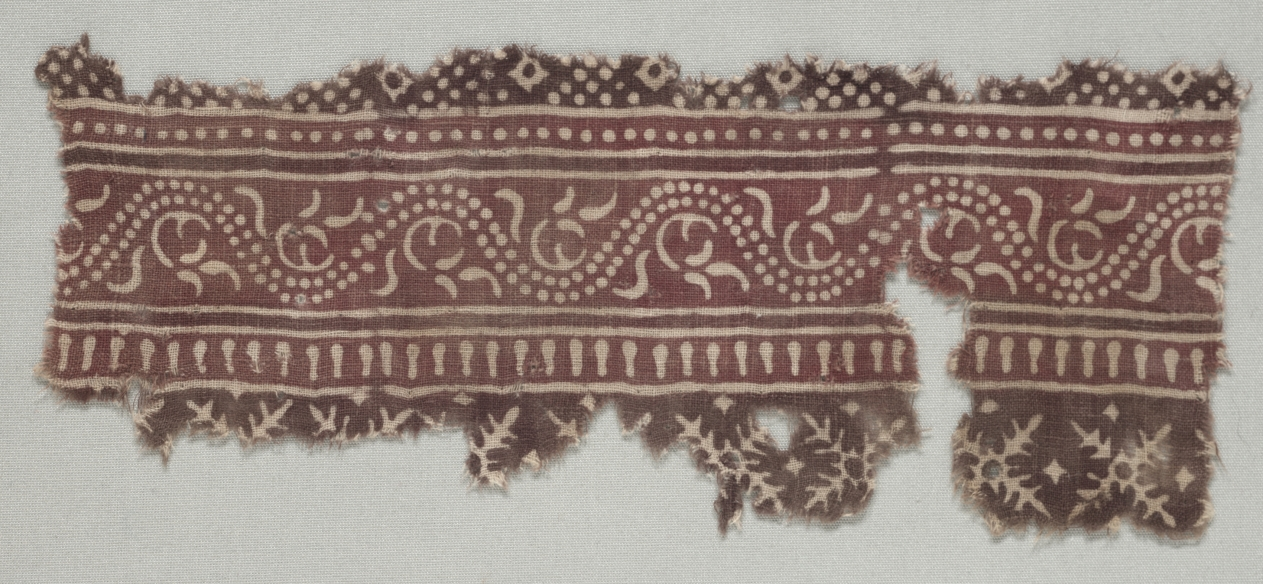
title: Fragment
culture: India, 12th-14th century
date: 1100s - 1300s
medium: plain cloth, resist dyed; cotton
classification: Textile